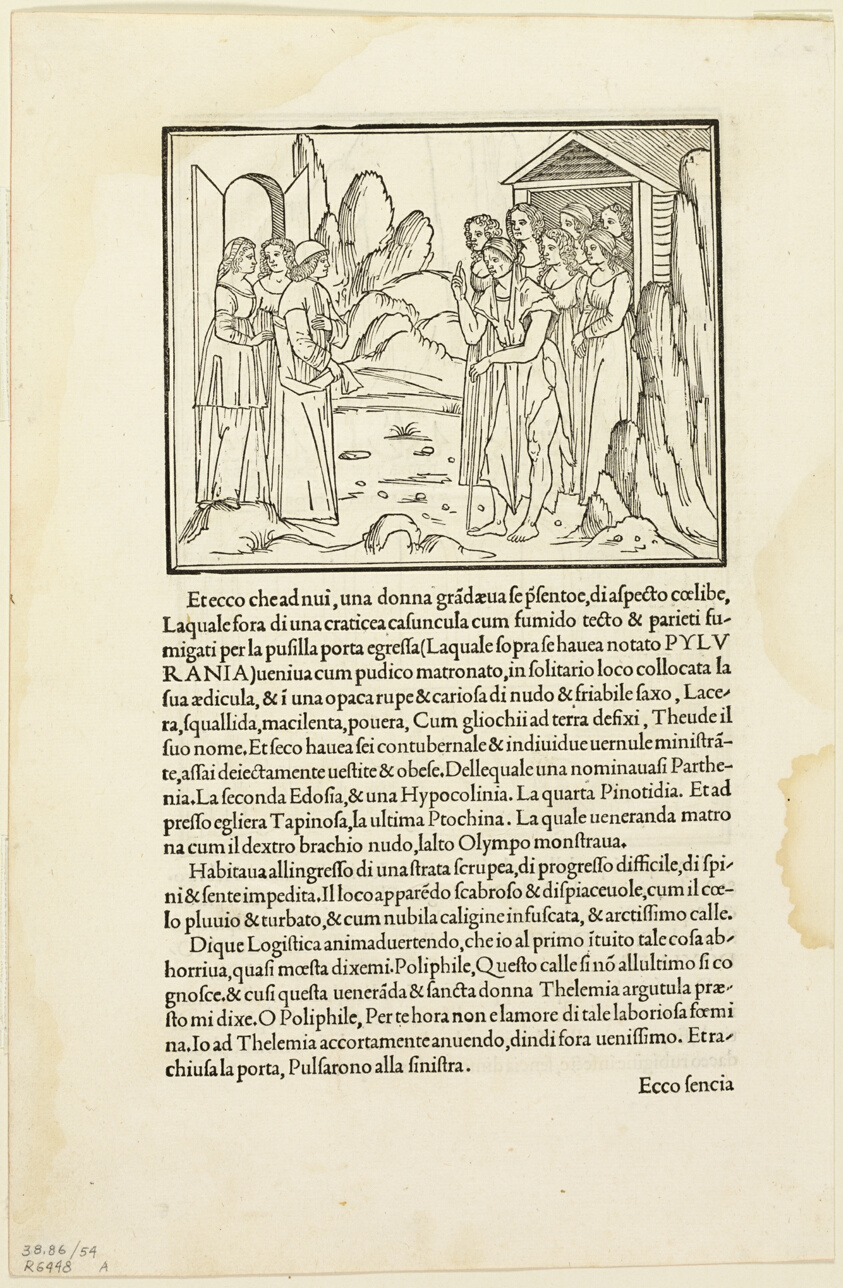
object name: Print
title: Poliphilus Meeting the Venerable Matron (recto) and Poliphilus in a Rocky Place (verso) from Hypnerotomachia Poliphili (The Strife of Love in a Dream) Plate 54 from Woodcuts from Books of the 15th Century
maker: Unknown Artist (Venice, late 15th century); printed by Aldus Manutius (Italian, 1449-1515); commissioned by Leonardo Crasso (Italian, active c. 1499–1509); original text by Francesco Colonna (Italian, 1433/34–1527); portfolio text by Wilhelm Ludwig Schreiber (German, 1855–1932)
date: 1499, portfolio assembled 1929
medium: Woodcut and letterpress in black (recto and verso) on cream laid paper, tipped onto cream wove paper mat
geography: Italy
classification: woodcut; print; prints and drawing